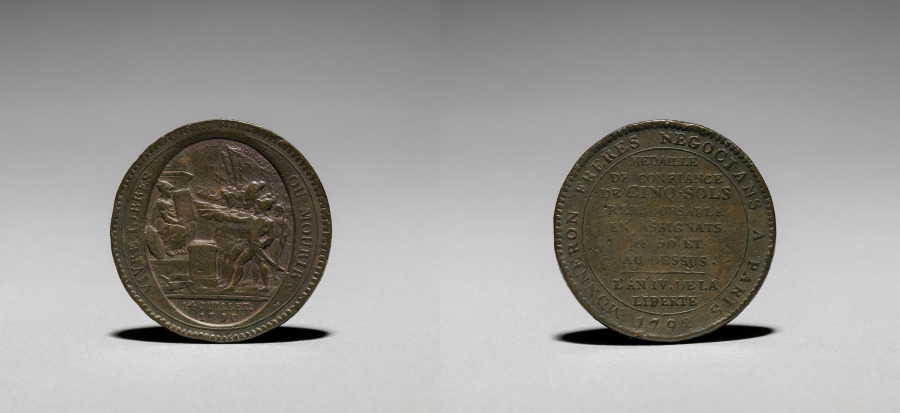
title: Medal: Five Sols issued by Monneron Brothers, Paris, 1792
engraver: Augustin Dupré (French, 1748-1833)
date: 1792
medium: bronze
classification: Metalwork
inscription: Monneron Freres Negociano. A. Paris 1792. Medalle de confiance de cinq. Sols remecursable en assignats ge 50 et audesses l'an IV dela liperte.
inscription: VIVRE LIBRES OU MOURIR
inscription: PACTE FEDERATIE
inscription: 14 JUILLET 1790